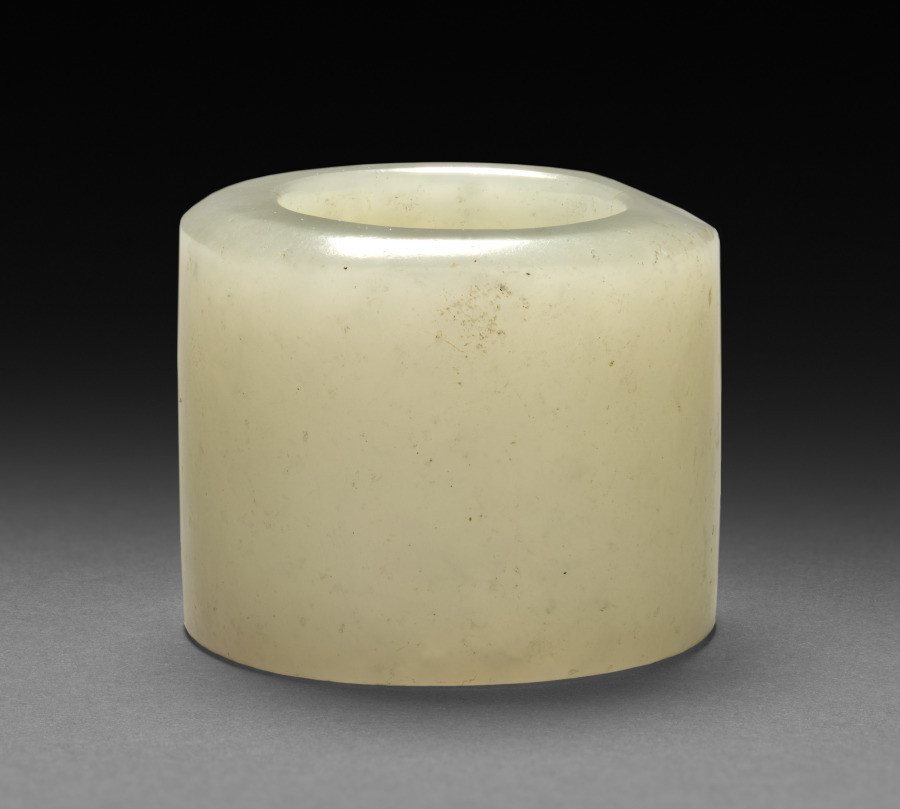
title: Thumb Ring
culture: China, Qing dynasty (1644–1911), Qianlong reign (1736–95)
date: 1736–95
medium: white jade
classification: Jade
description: Jade rings were worn by men on the thumb of the right hand to assist with holding and pulling the string of the archer’s bow. However, thumb rings were also fashionable accessories for civil officials in the late Qing dynasty.